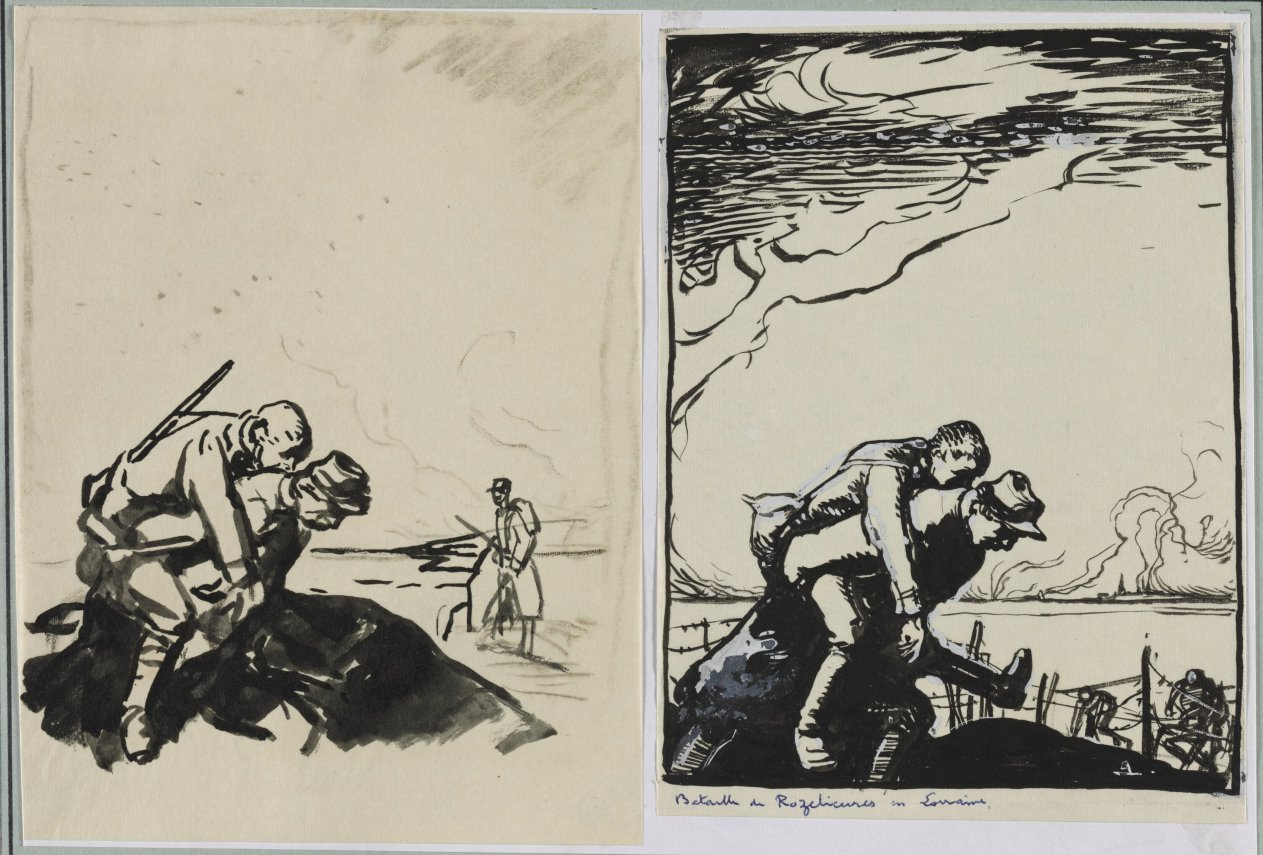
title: Bataille de Rozelieures en Lorraine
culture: France, 20th century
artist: Auguste Louis Lepère (French, 1849–1918)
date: 1914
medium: brush and black ink heightened with white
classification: Drawing